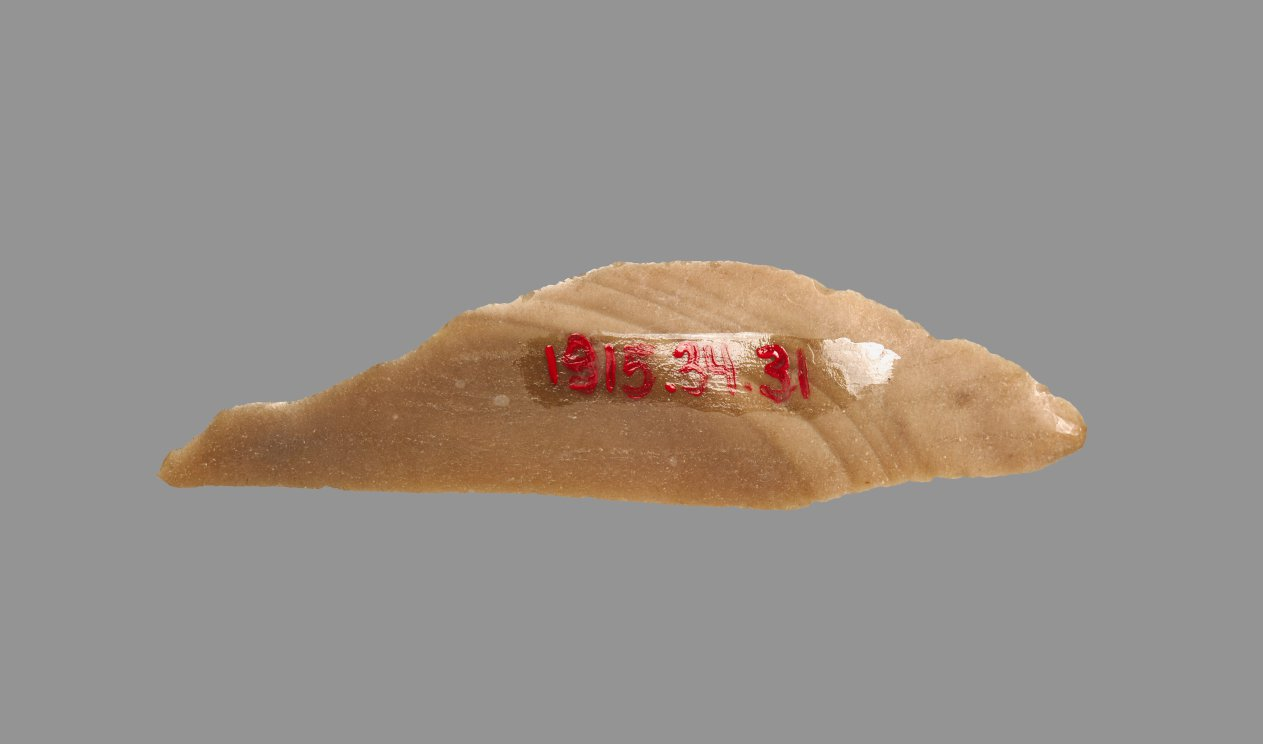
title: Sickle Blade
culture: Egypt, Middle Kingdom (2040–1648 BCE), Dynasty 12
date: 1980–1801 BCE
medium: flint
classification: Implements